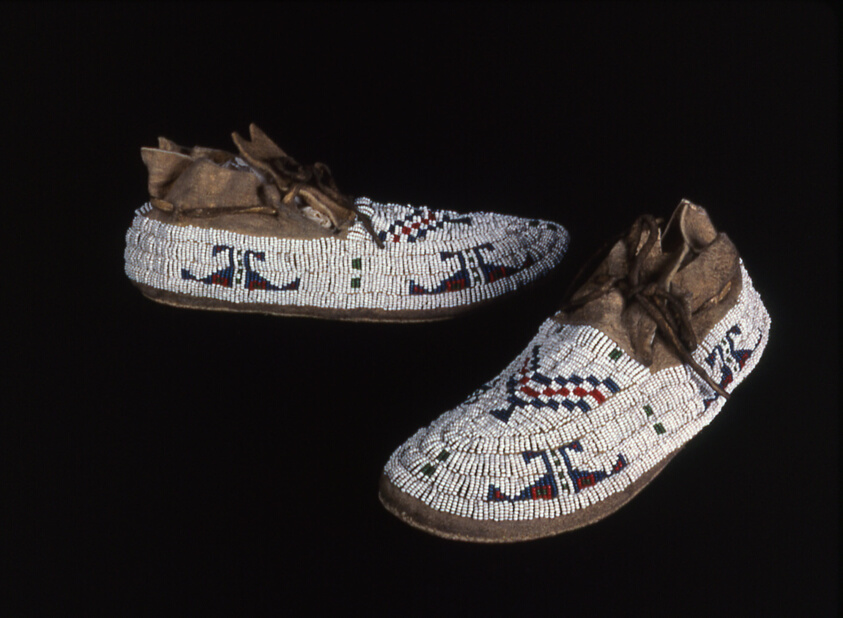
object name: Textile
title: Pair of Moccasins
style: arapaho, plains indian, native american, americas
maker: Artist unknown (Arapaho, Hinono’ei); Central Plains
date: c. 1885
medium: Doe skin, sewn with sinew; decorated with beads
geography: Central Plains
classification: textile; shoes - needlework; costume accessory - shoe; costume accessory; costume; dress (garment); clothing